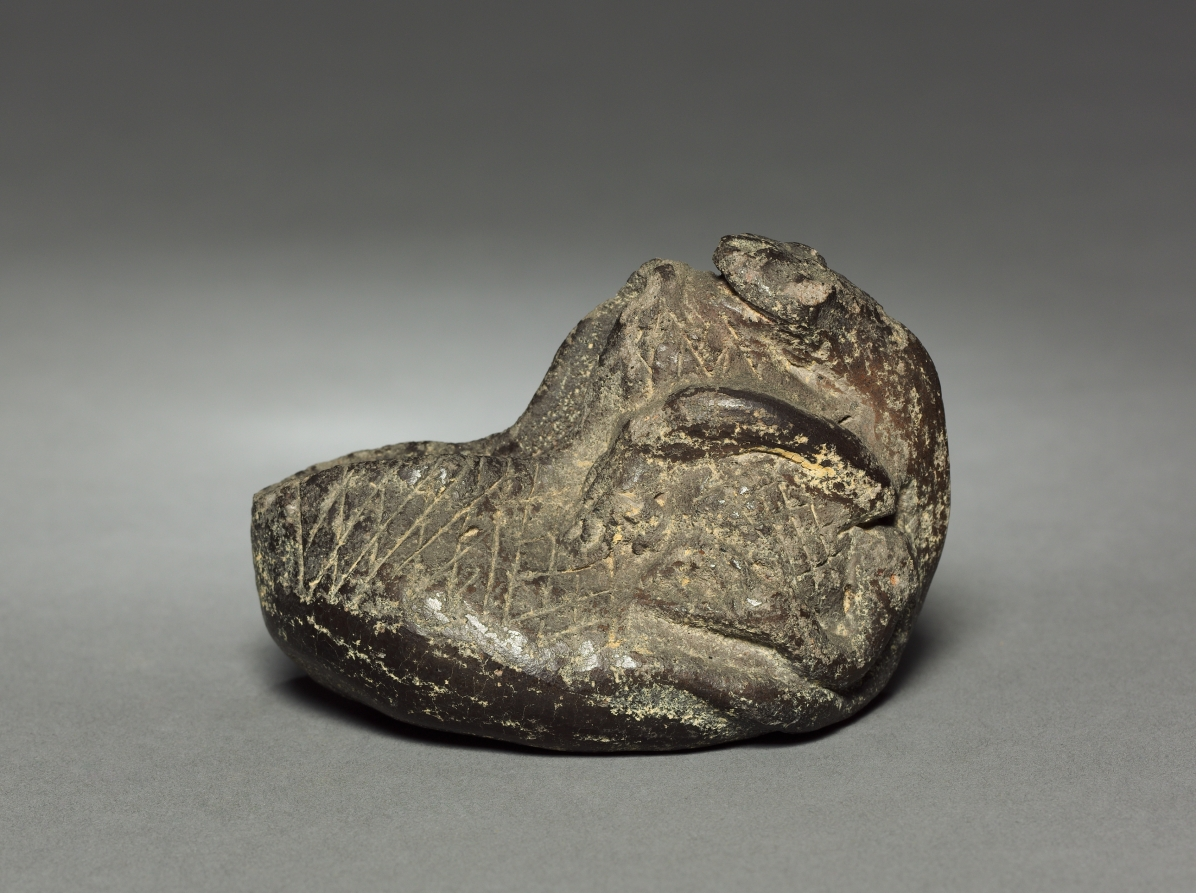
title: Dish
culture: Colombia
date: before 1921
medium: pottery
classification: Ceramic